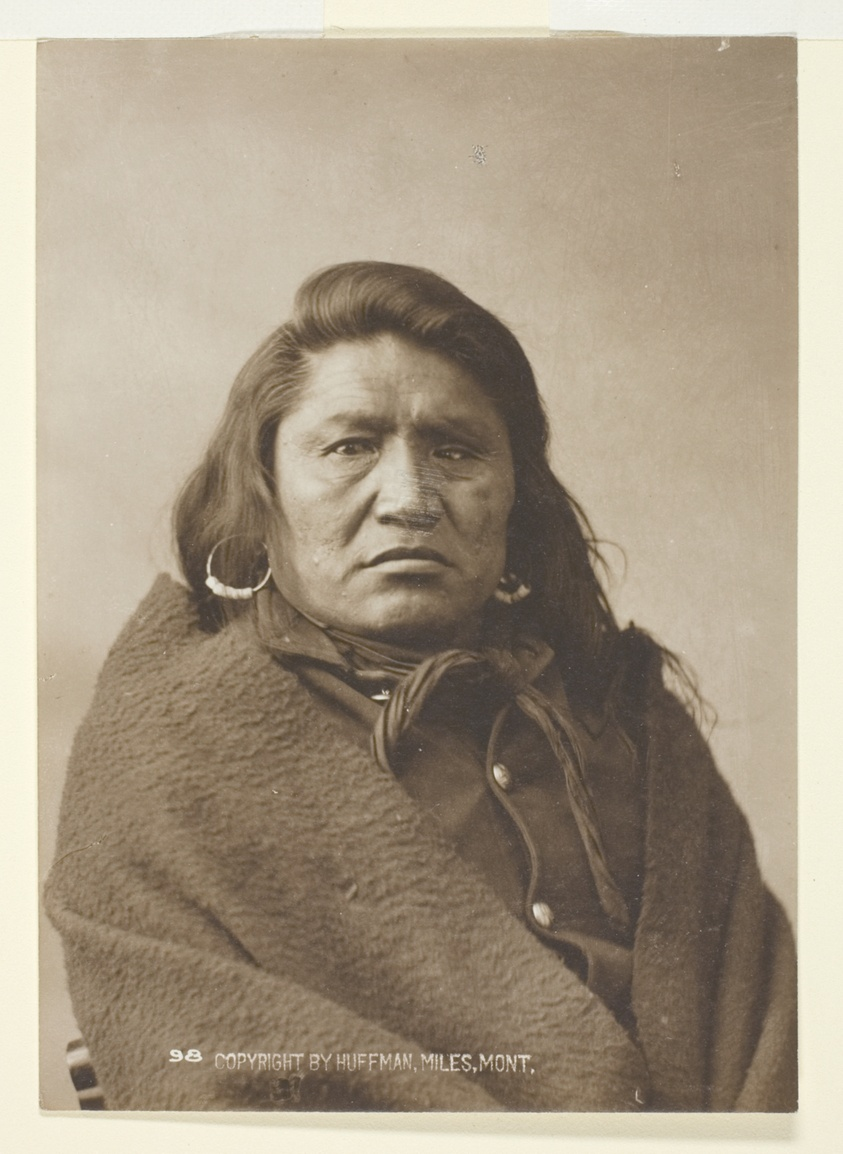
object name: Photograph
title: Deaf Bull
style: 19th century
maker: Laton Alton Huffman (American, 1854–1931)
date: c. 1880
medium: Gelatin silver print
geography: United States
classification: gelatin silver (developing-out-paper) pr; photographic process; photography; photograph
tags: portraits, portraits: Native American subject, photography